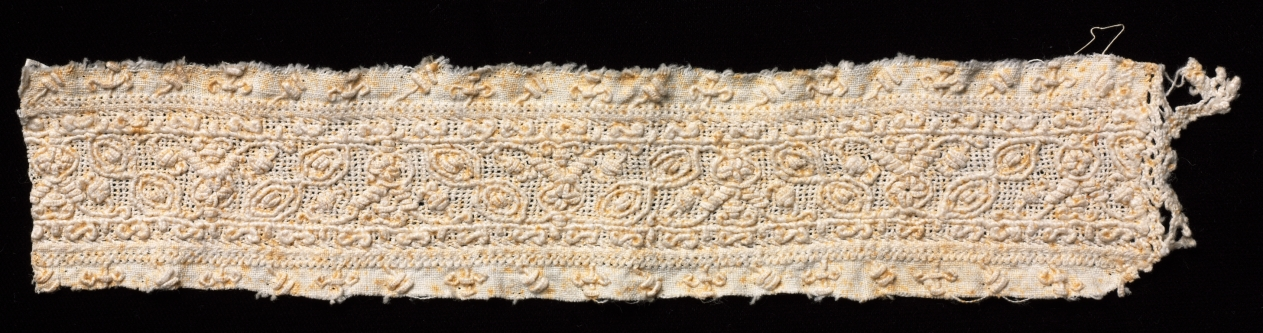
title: Fragment of a Band with Abstract Pattern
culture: Italy, Venice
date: 1500s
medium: Bleached linen: needle lace, burato (twined ground and darned in one direction)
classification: Lace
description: In the buratto technique, the background pattern, known as the ground, is created by threads twined together. The tight twining on this ground contributes to the intricacy of the meandering geometric patterns.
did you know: The word lace derives from the Latin laqueus, meaning noose.